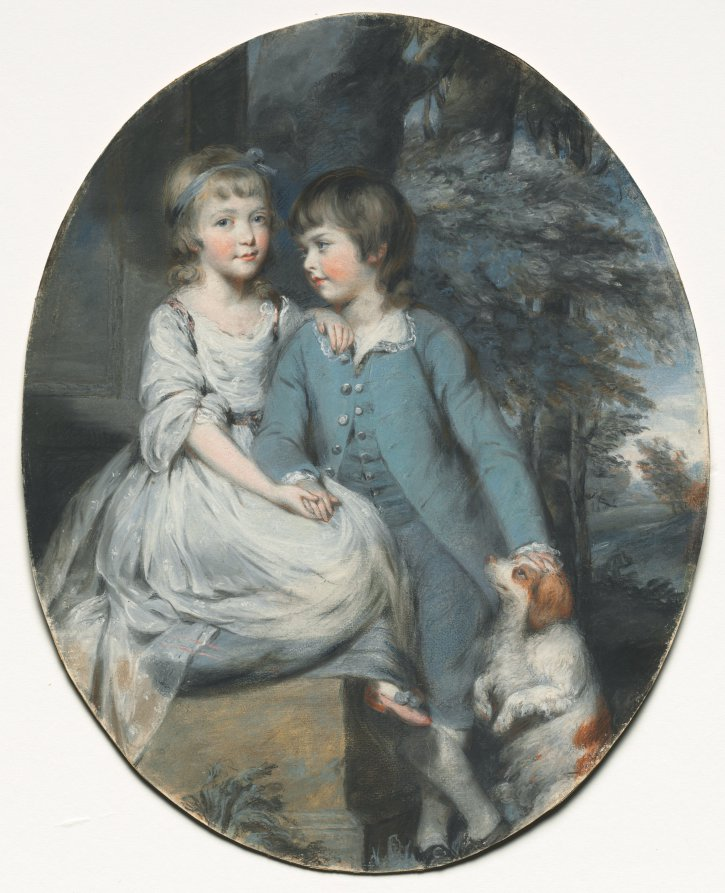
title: Cropley Ashley-Cooper (Later 6th Earl of Shaftesbury) with His Sister Mary Anne Ashley-Cooper, Later Lady Sturt of Crichel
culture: England, 18th century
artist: Daniel Gardner (British, c. 1750–1805)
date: c. 1776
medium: pastel with black and red chalk and graphite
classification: Drawing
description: Daniel Gardner built a lucrative career that was based on fashionable portraiture, especially small-scale works in pastel, often in oval formats with landscape backgrounds. Executed in this format, this portrait is one of many by the artist that depicted children, his primary subjects. Here, the young Cropley Ashley-Cooper, later the 6th Earl of Shaftesbury, gazes fondly at his older sister, Mary Anne, who holds his hand and encircles his shoulders in close affection. Gardner took advantage of the special optical properties of pastel, whose minute, irregular particles reflect light diffusely, allowing an unparalleled velvety brilliance.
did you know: This pastel was presumably commissioned from Daniel Gardner by the children's father, who was himself the subject of a portrait by the artist.